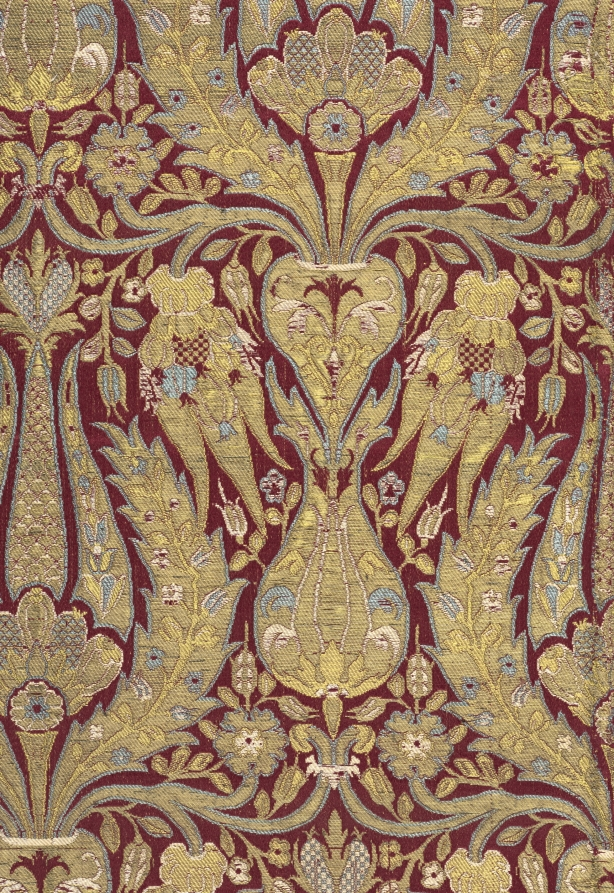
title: Fragment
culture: Italy, 16th century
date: 16th century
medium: Silk brocade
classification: Textile